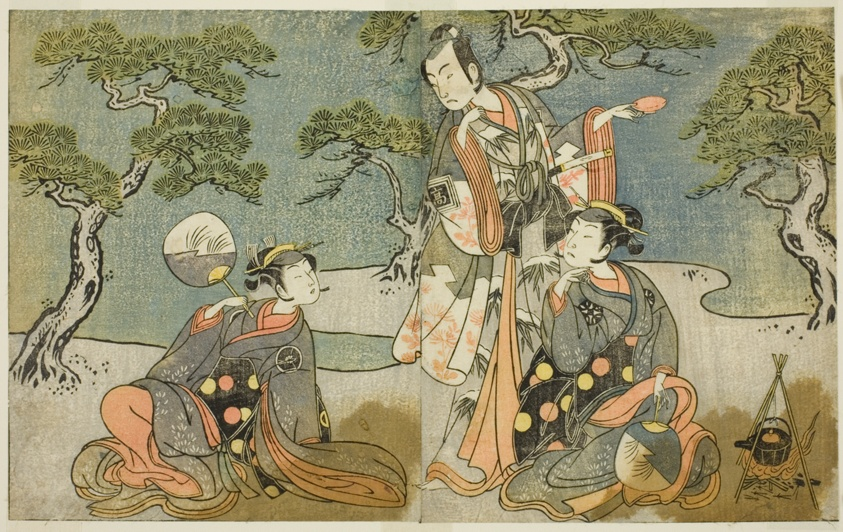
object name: Print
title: The Actors Nakamura Nakazo I as Matsukaze (right), Ichikawa Komazo II as Ariwara no Yukihira (center), and Iwai Hanshiro IV as Murasame (left), in the Play Kuni no Hana Ono no Itsumoji, Performed at the Nakamura Theater in the Eleventh Month, 1771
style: Japanese (culture or style)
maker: Katsukawa Shunsho 勝川 春章; Japanese, 1726-1792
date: c. 1772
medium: Color woodblock print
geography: Japan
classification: woodblock print; print; asian art